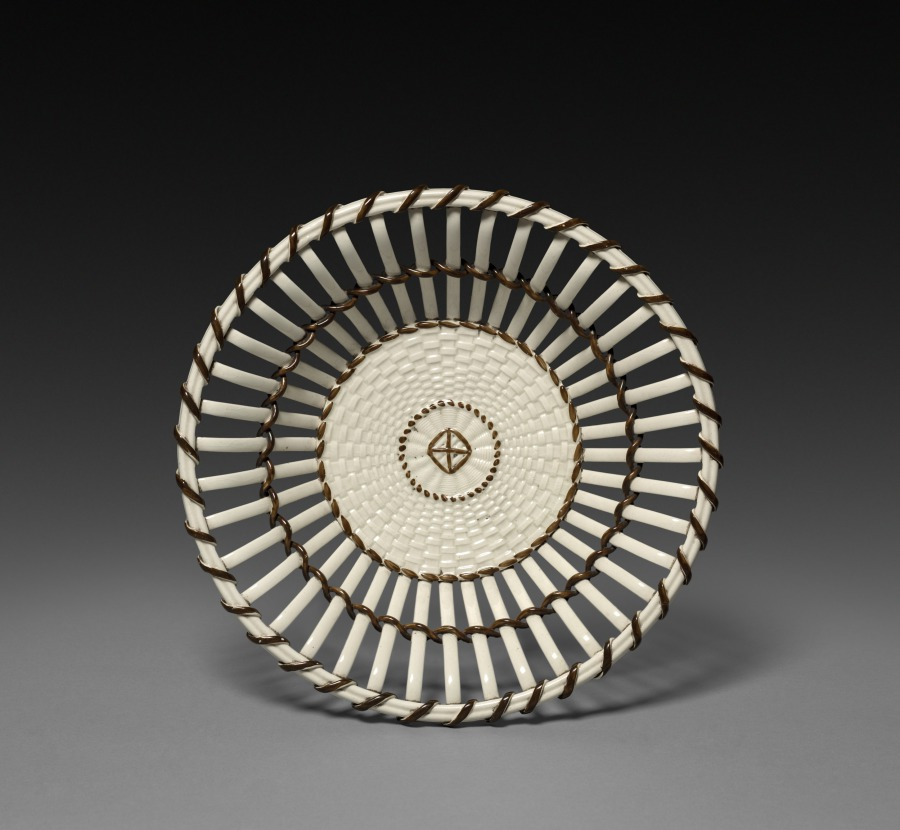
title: Bowl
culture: England, Staffordshire, 18th century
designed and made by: Wedgwood Factory (British)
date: late 1700s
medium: earthenware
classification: Ceramic